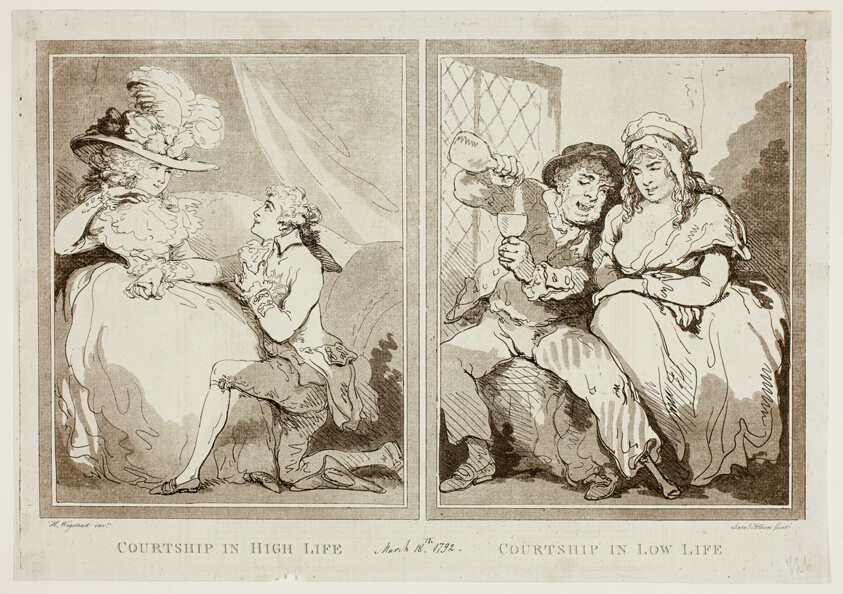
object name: Print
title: Courtship in High and Low Life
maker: Samuel Alken (English, 1750-1815)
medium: Hand-colored etching with aquatint on paper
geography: England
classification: aquatint; print; prints and drawing